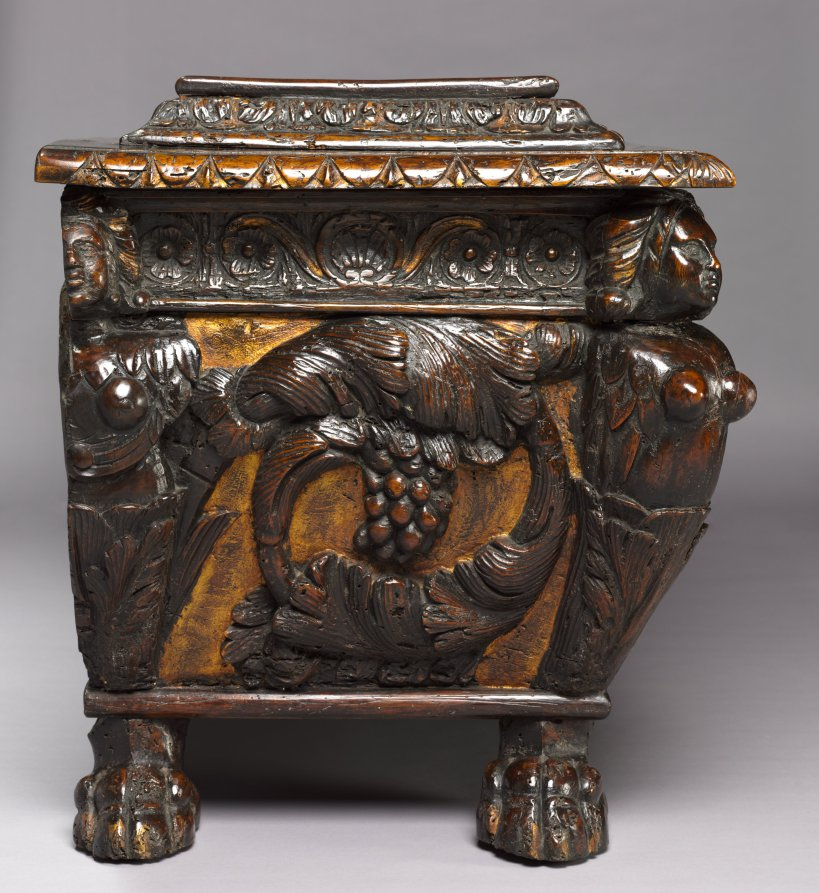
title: Marriage Chest (Cassone)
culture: Italy, early 16th century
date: early 1500s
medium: walnut with traces of gilding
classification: Furniture and woodwork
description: Large storage chests resembling ancient Roman burial vaults-a popular collectible among wealthy families during the Renaissance-were often associated with an important marriage and contained the wife’s dowry of clothes and precious objects. This particular example displays the arms of the Spada Family of Rome amidst a richly carved façade on a gilded ground. Sometimes cassoni were carried in the marital procession from the bride’s home to that of her future husband, emphasizing the power and wealth of both families.